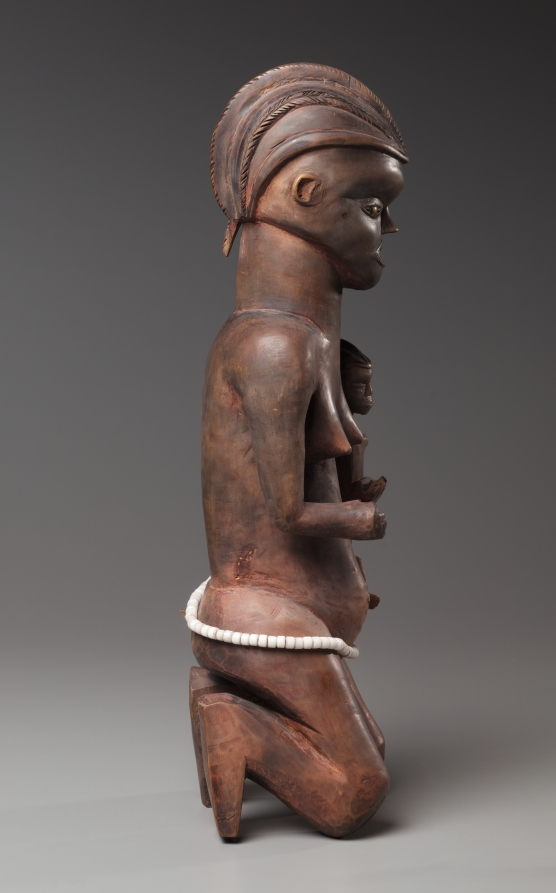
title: Mother-and-Child Figure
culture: Africa, Central Africa, Democratic Republic of Congo, Pende-style maker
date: late 1800s–early 1900s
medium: Wood, glass beads, upholstery studs, natural fiber, and pigment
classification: Sculpture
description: Wearing an elaborate lobed headdress and a beaded waistbelt, and having filed teeth and red-powdered skin, this maternity figure seems to have once carried an ax and a cup, wooden imitations of the two most important chiefly attributes. Perhaps together with a male counterpart, it was secretly kept inside the ritual house, serving as a guardian of the chief’s treasure. Its style places it in the westernmost corner of Pendeland, between the Lutshima and Kwilu rivers.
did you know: Eastern Pende carvers also once made larger mother-and-child sculptures to adorn the tops of chiefs' ritual houses.